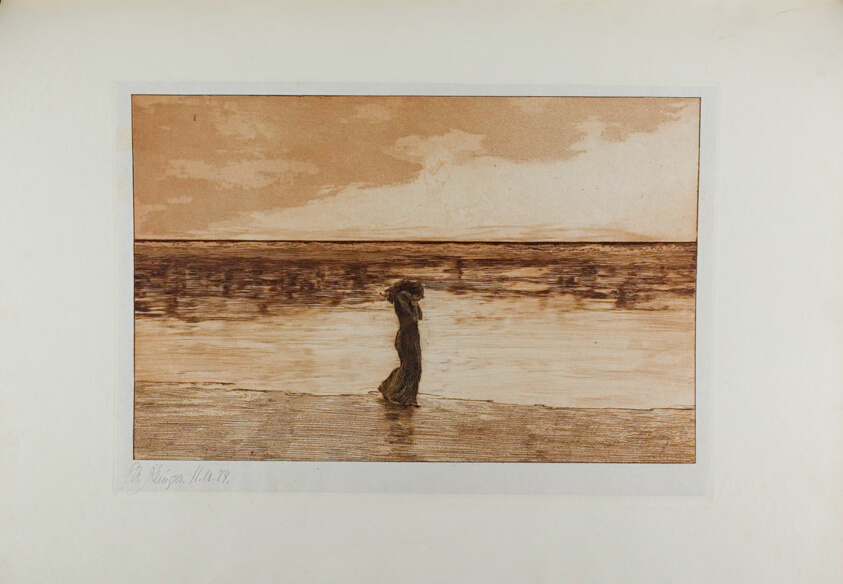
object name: Print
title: Abandoned, plate five from A Life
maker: Max Klinger (German, 1857-1920); printed by Otto Felsing (German, 19th century)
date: 1884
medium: Etching and aquatint, with stipple and drypoint, in sanguine on ivory China paper, laid down on cream laid paper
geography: Germany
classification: etching; print; prints and drawing